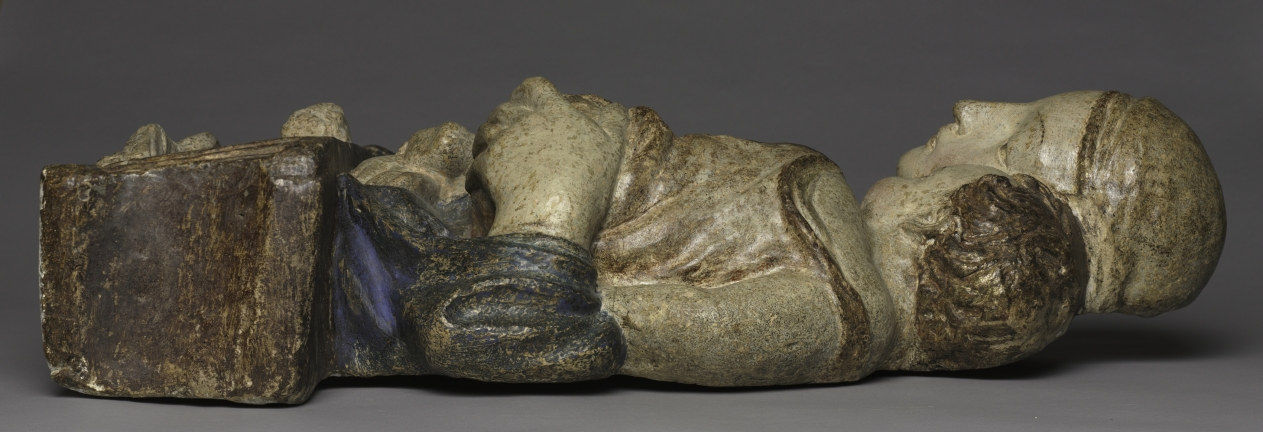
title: Madonna and Child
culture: Italy, Florence, 15th century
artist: circle of Lorenzo Ghiberti (Italian, 1378–1455)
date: c. 1450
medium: polychromed terracotta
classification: Sculpture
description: This half-length Madonna represents one of the finest of about 40 surviving variants, all of which display many characteristics of the Florentine bronze sculptor Lorenzo Ghiberti. These features include serene facial types with narrow eyes and thin eyebrows, the careful arrangement of the Madonna and Child, forehead to cheek, and the infant's twisting pose. The popularity of this devotional relief began around 1420 and continued until around 1500. Ghiberti was the most successful bronze sculptor of the early Renaissance in Florence. His fame rests upon the commissions he received for two sets of bronze doors, completed between 1401 and 1424, for the Baptistry in Florence. The reclining figure of Eve on the base of this Madonna and Child (suggesting Mary as the new Eve) stems from a similar figure on the upper left door of the Porta del Paradiso, the second set of Baptistry doors. Eve's presence on the base clearly substantiates the attribution to Ghiberti and helps date the relief.